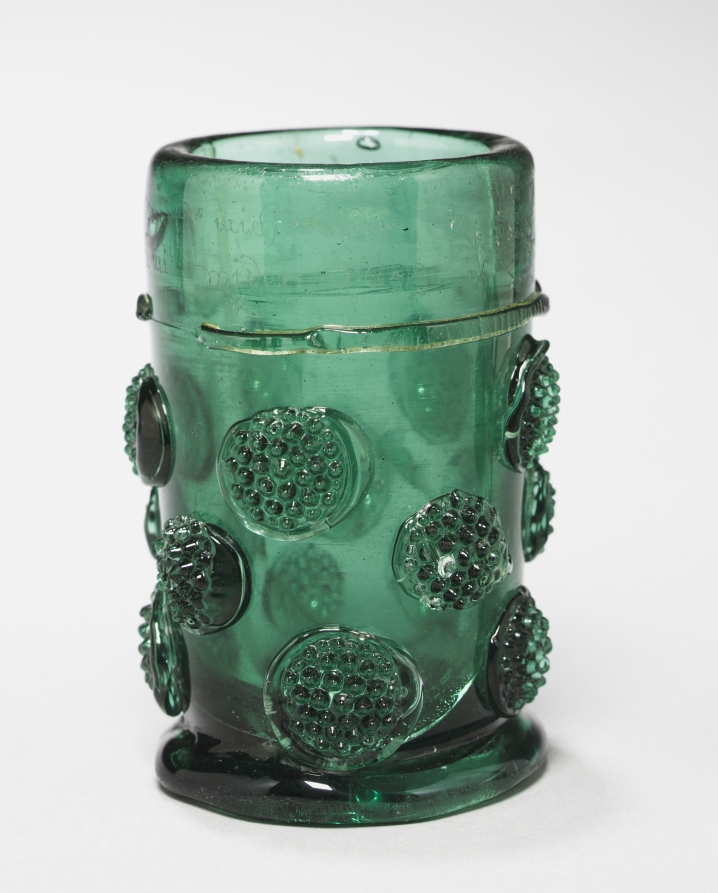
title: Beaker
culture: Germany, probably Saxony, 17th century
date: 1653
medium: green glass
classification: Glass